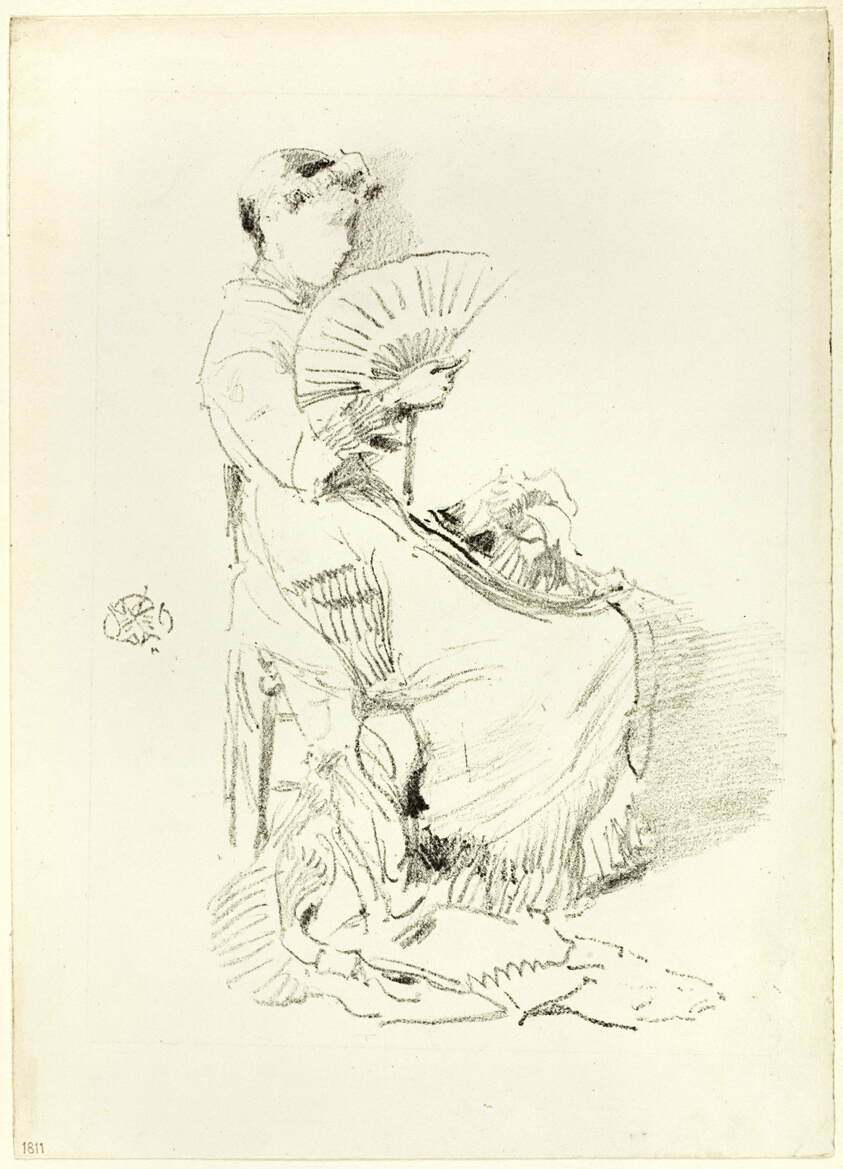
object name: Print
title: The Fan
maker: James McNeill Whistler (American, 1834-1903)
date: 1879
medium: Transfer lithograph in black ink on ivory plate paper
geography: United States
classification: transfer lithograph; lithograph; print; prints and drawing; paper